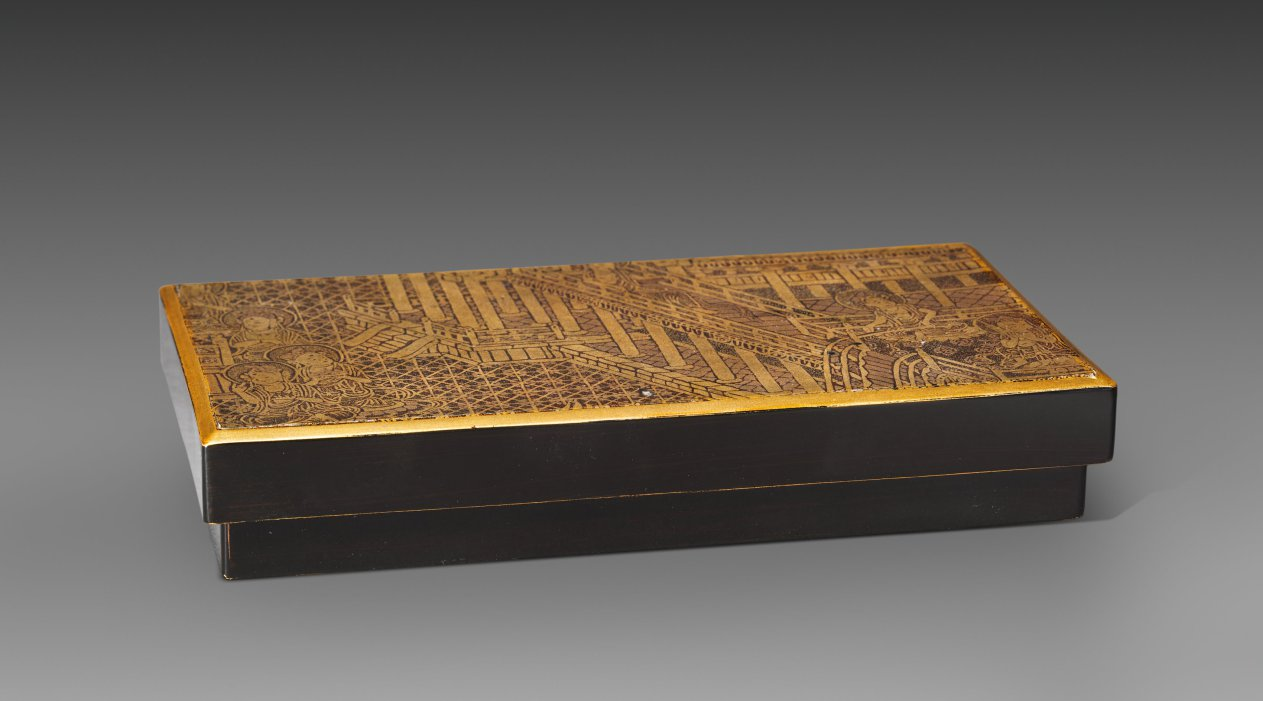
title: Fragment Mounted as a Box Cover with a Scene from Amida's Paradise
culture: Japan, Heian period (794–1185)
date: 1100s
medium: gold lacquer on wood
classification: Lacquer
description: The lid of this box has a fragment of an image representing the Pure Land of the Buddha Amida, and an interior decorated with lotus petals. The original, complete composition may have been a panel housed within a shrine cabinet, and used for meditation. An aversion to discarding sacred images likely led to the fragment’s incorporation into this small box.